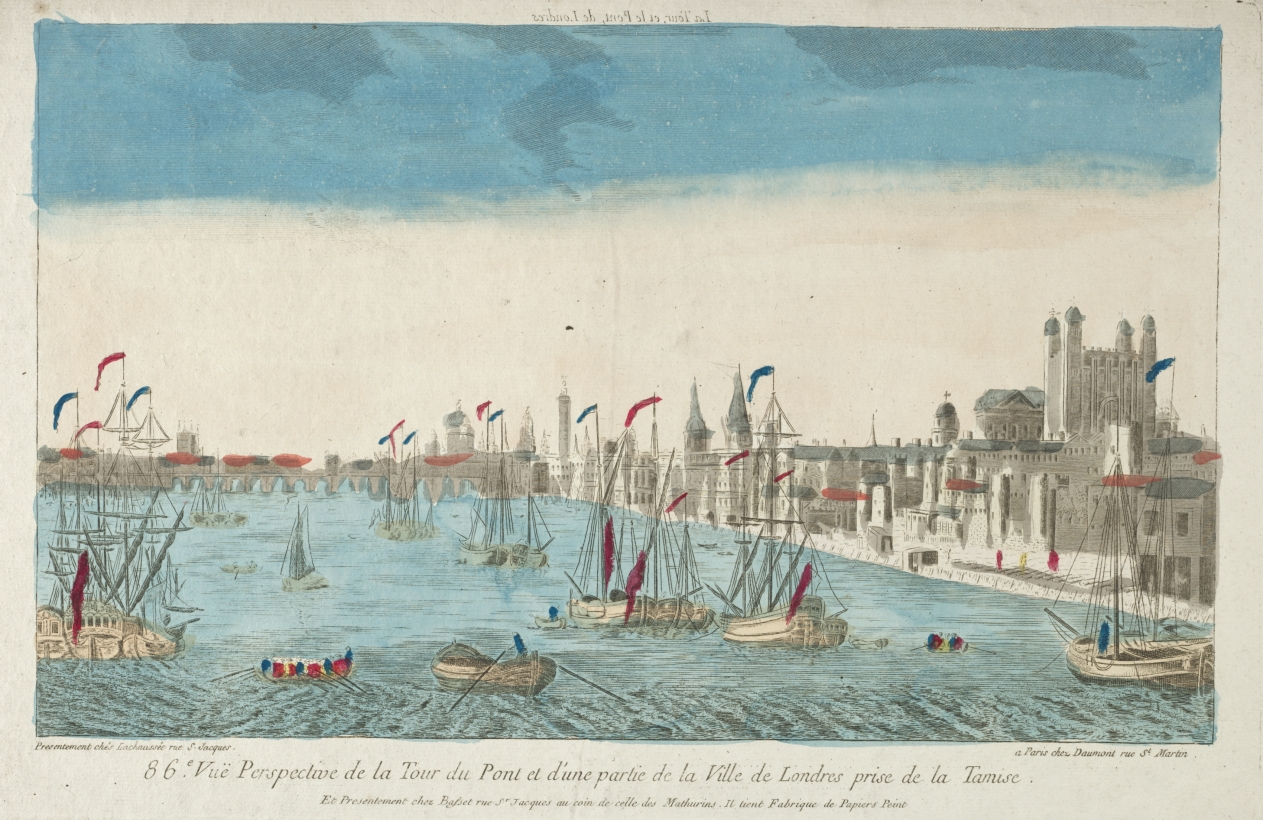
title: View of London Bridge and Tower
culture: England, 18th century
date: 18th Century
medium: hand-colored engraving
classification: Print